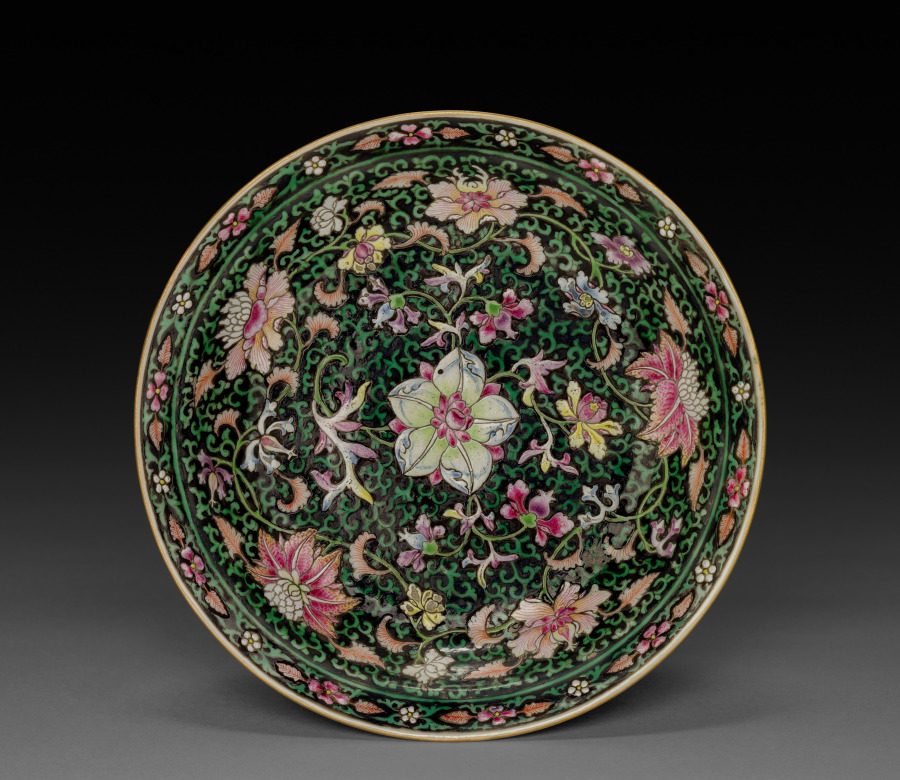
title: Dish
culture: China, Qing dynasty (1644–1911), Qianlong reign (1736–95)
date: 1736–95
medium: porcelain with famille rose overglaze enamel decoration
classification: Ceramic